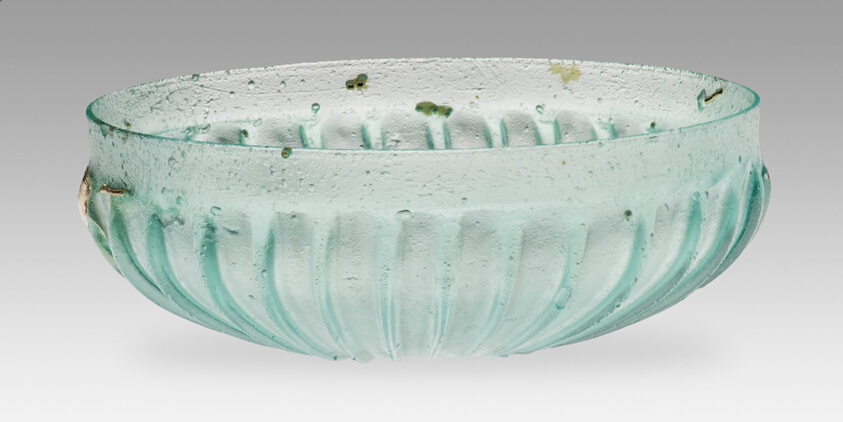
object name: Vessel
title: Bowl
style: imperial (roman), palestinian, syrian, ancient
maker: Roman; coast of Syria or Palestine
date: late 1st century BCE-early 1st century CE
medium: Glass, cast (sagged?)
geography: Levant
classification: bowl; glass; vessel; ancient art; container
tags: bowl, dining, drinking